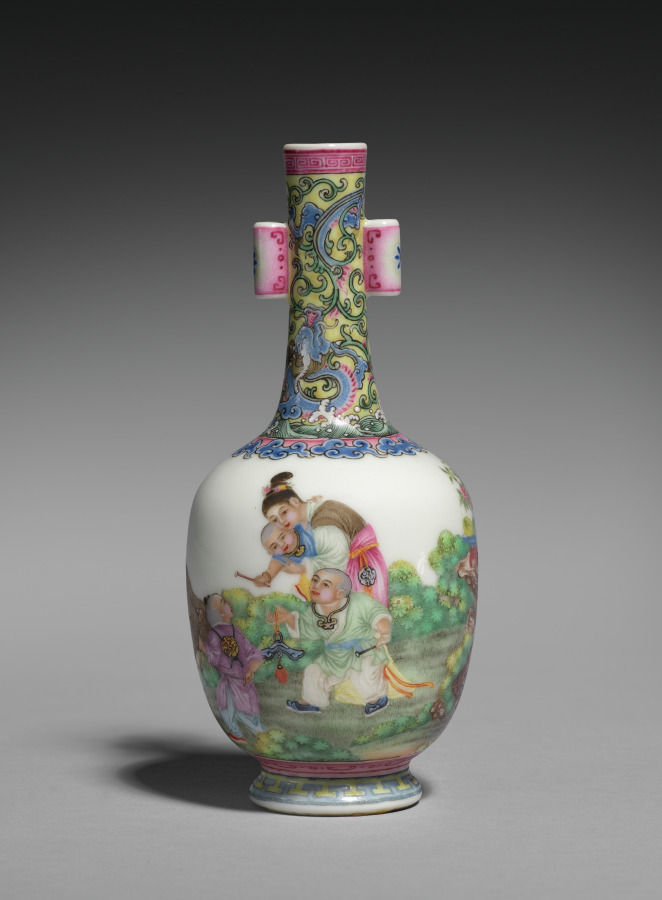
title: Vase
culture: China, Qing dynasty (1644-1911), Qianlong mark and reign (1736-95)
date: 1736–95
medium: Porcelain with decoration in colored fa-lang enamels, Guyuexuan ware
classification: Ceramic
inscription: 乾隆年製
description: The four-character mark on the base of this vase indicates that it was made in Jingdezhen and then sent to Beijing to be decorated in the imperial workshops by painters who were trained in using Western perspective and shading.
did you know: The child in orange has a bun above his ear, while the rest of his head is clean-shaven, like the other children’s.